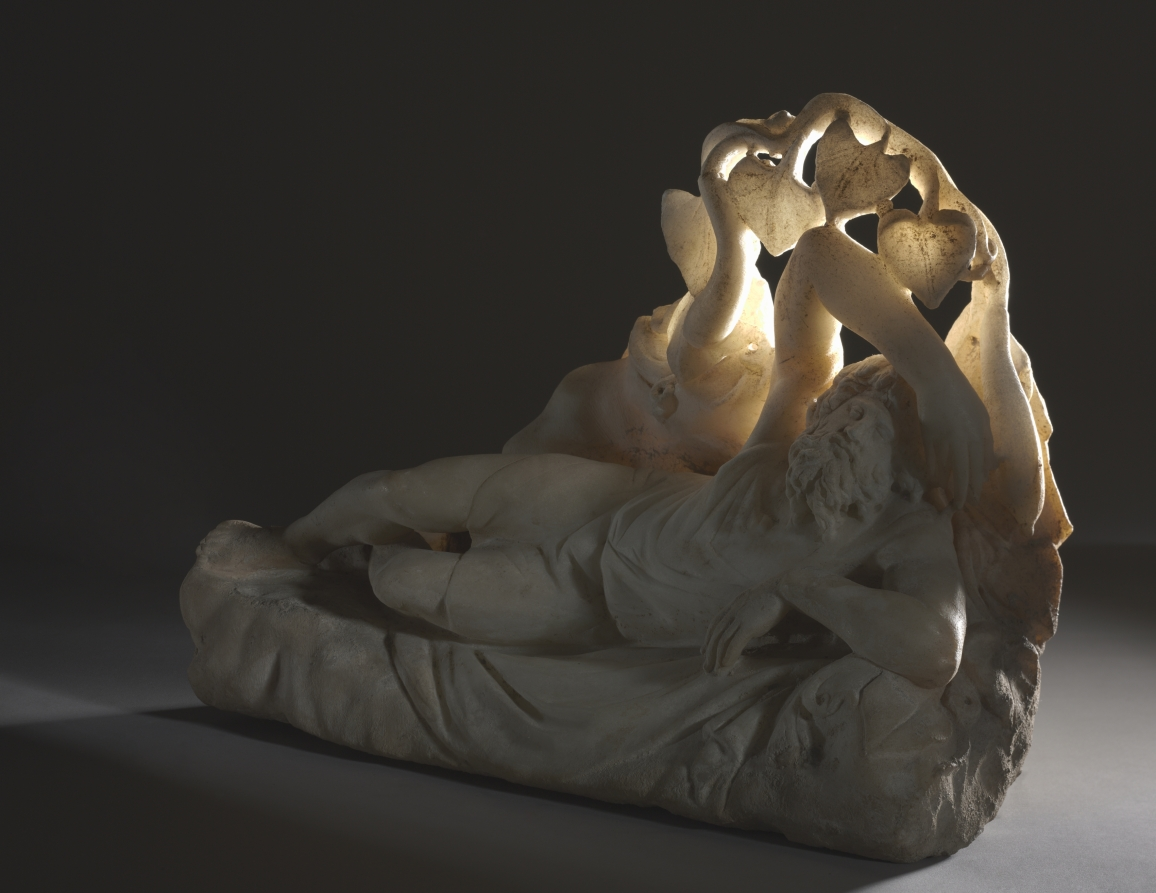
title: Jonah Under the Gourd Vine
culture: Anatolia, late Roman-early Christian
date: 280–90 CE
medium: marble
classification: Sculpture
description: After disobeying the Lord’s command to proclaim judgment on the city of Nineveh, the Old Testament prophet Jonah was cast into the sea, swallowed by a sea monster, and ultimately cast ashore. When asked a second time, Jonah obeyed the Lord but became displeased when the city was spared. After pleading for Nineveh’s destruction, Jonah left the city and rested in the shadow of a large gourd vine. The Lord, however, made the vine wither, exposing Jonah to the burning sun.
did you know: The sculpture shows the dramatic moment when the Jonah, having languished in the desert, is saved by the shade of a gourd vine. The sculptor paid great attention to detail such as Jonah's bushy beard echoing the large leaves overhead.